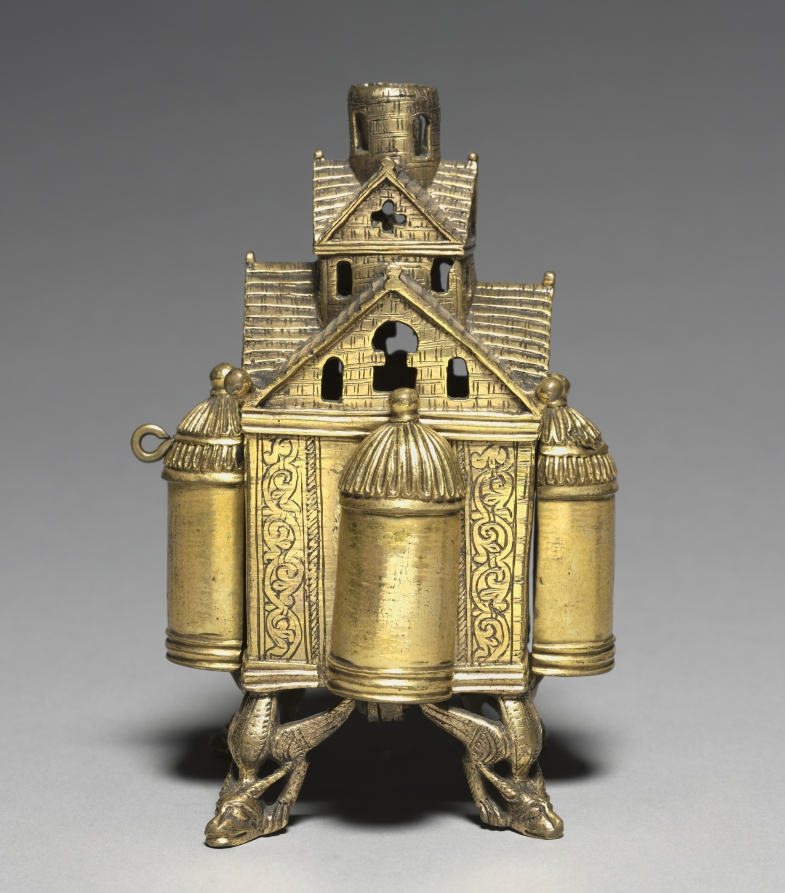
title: Incense Burner and Stand for an Altar Cross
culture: Germany, Lower Saxony, Hildesheim?, Romanesque period, 12th century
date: 1150–75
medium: bronze: cast, gilded, engraved, and chased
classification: Metalwork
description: Supported by dragon-shaped feet on its corners, this unusual object is fashioned like a small, centralized church with gabled roofs, a lantern crowned by a turret, and four semi-circular apses. Traces of soot on the interior walls of a nearly identical object in the Kunstgewerbemuseum in Berlin indicate that these objects once served as incense burners. The objects’ design with an open turret in the center of the roof further suggests that they may have doubled as stands for altar crosses. The fact that both objects formerly belonged to the Bouvier Collection in Amiens may be taken as an indication that they were made as a pair in the same 12th-century workshop.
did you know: This object may been have created for a traveling court with its entourage to use for Catholic Mass, where incense could be used in an easily transportable vessel.